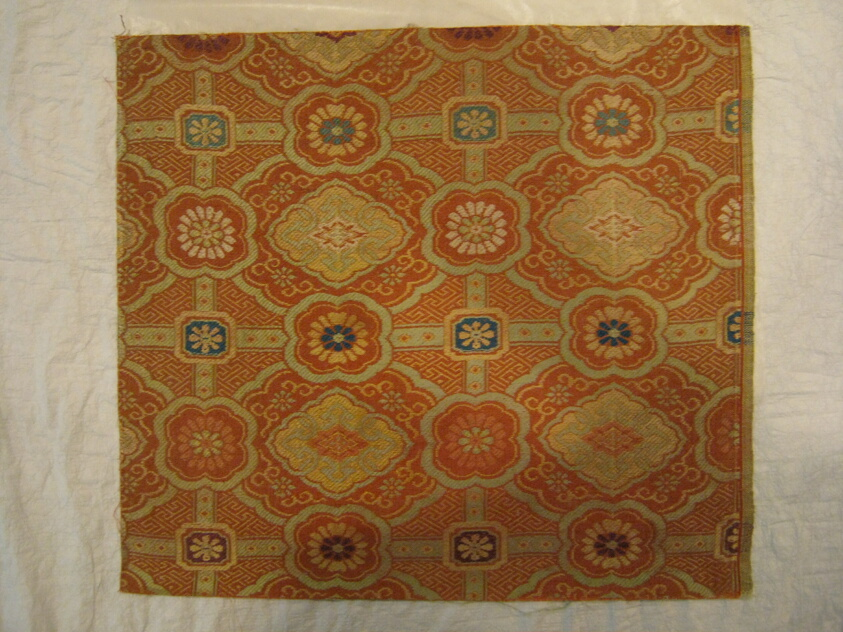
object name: Textile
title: Fragment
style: late edo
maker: Japan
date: late Edo period (1789–1868), 1825/75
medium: Plain compound cloth, silk.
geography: Japan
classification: textile; weaving